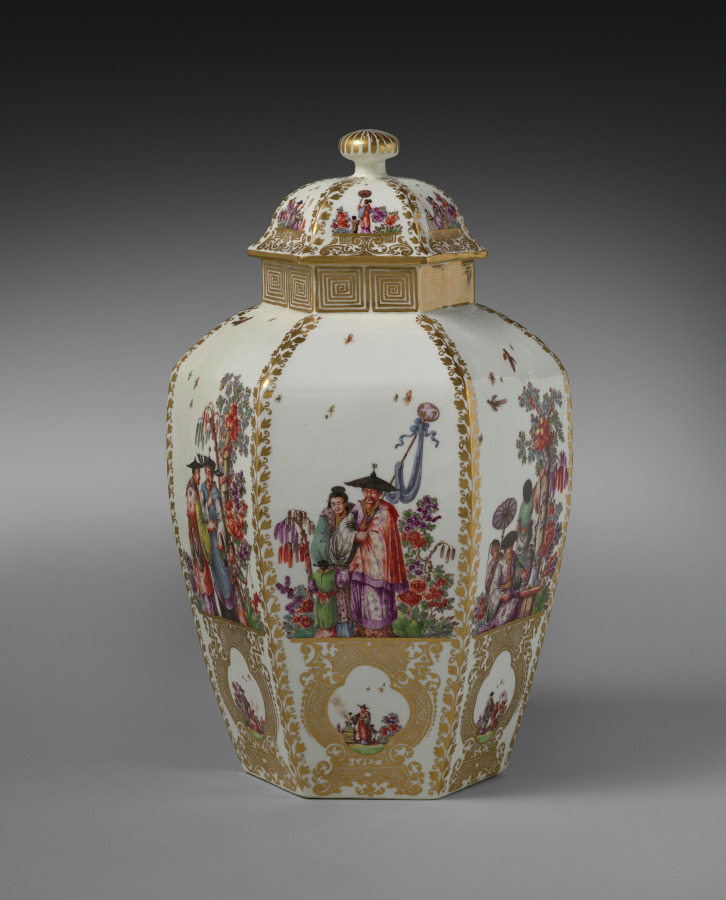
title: Covered Vase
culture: Germany, Meissen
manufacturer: Meissen Porcelain Factory (German, est. c. 1710)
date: c. 1728–30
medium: porcelain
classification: Ceramic